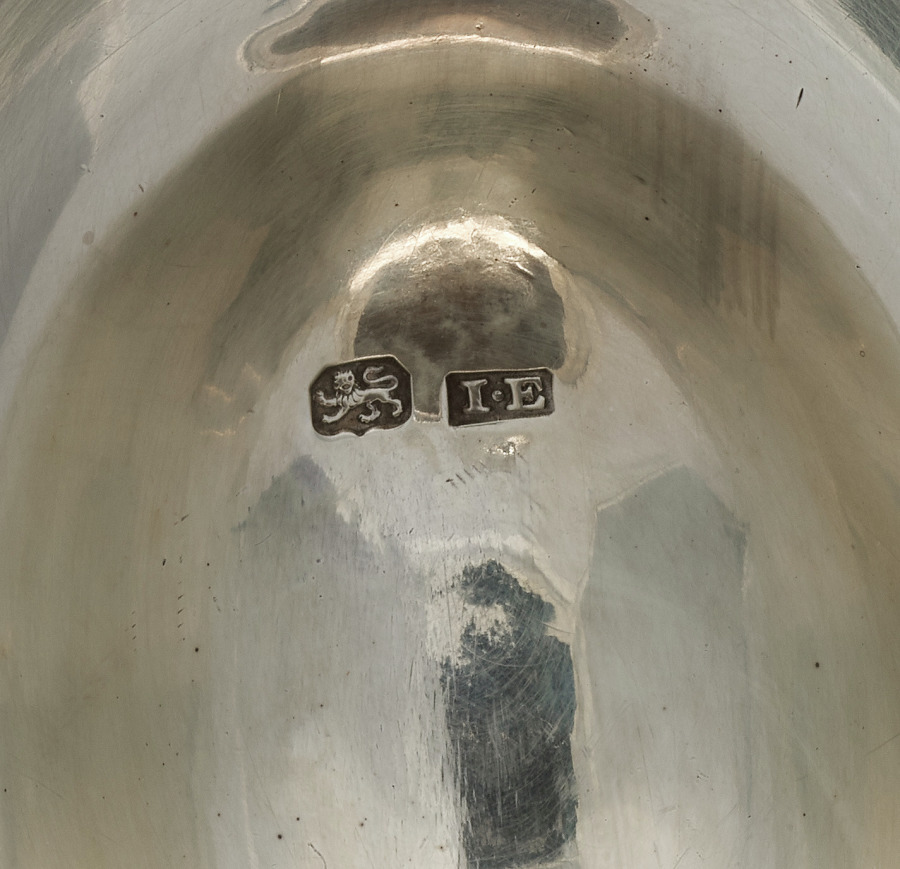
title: Hot Water Jug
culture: England, early 19th century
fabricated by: John (British) Edwards (British)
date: 1800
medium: silver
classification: Metalwork